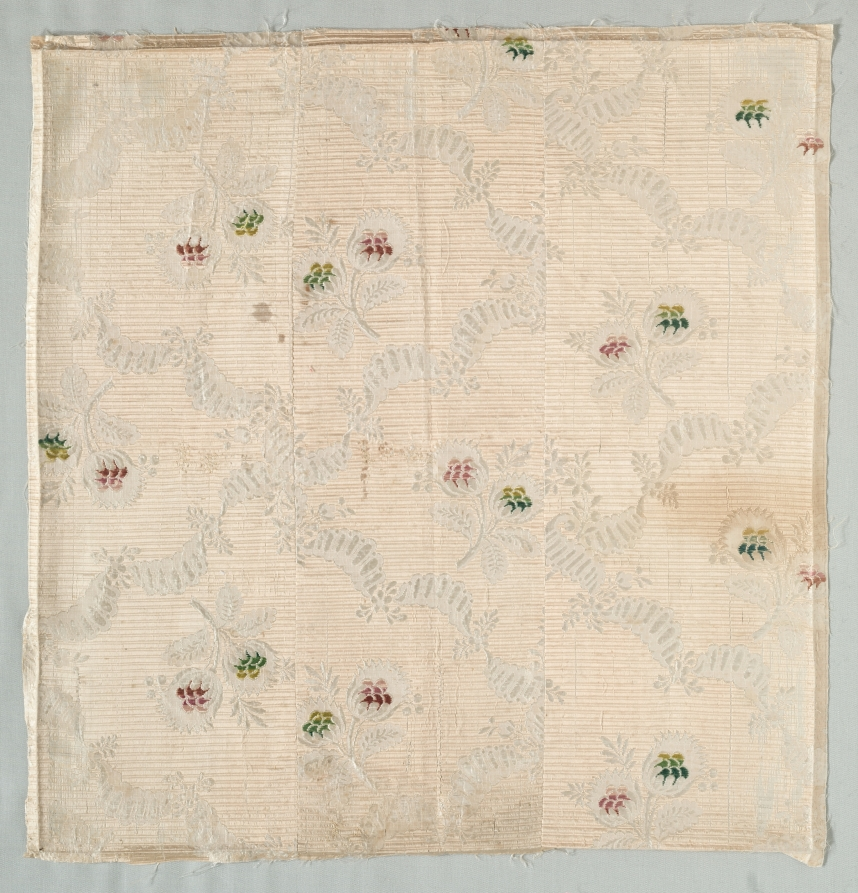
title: Panel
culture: France, mid-18th century, Period of Louis XV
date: mid 1700s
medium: tabby; brocaded silk with flushing warp weave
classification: Textile